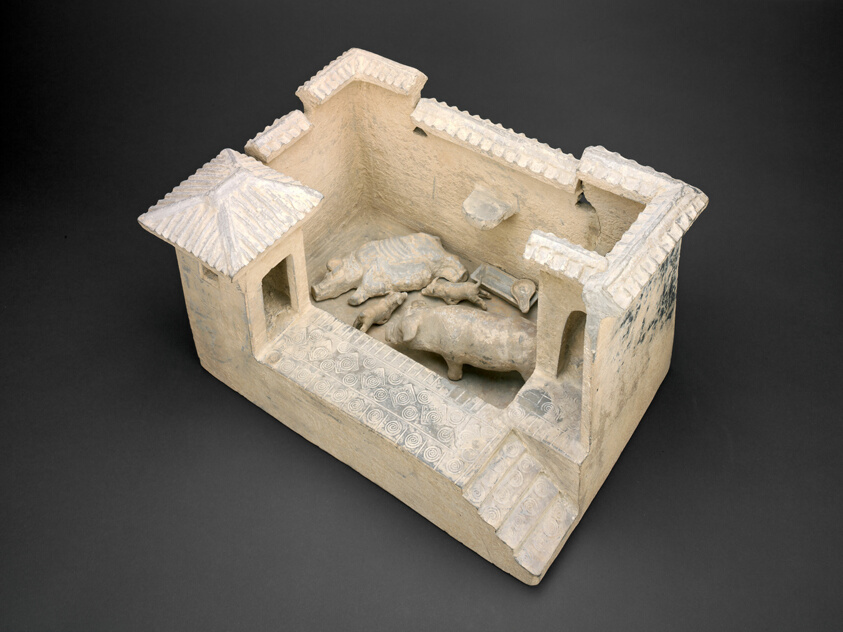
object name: Sculpture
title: Model of a Pigsty and Latrines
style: Chinese (culture or style)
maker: China; probably from Henan province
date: Han dynasty (206 BCE–220 CE), 100 BCE–100 CE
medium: Gray earthenware with stamped decoration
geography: China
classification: earthenware; ceramics; sculpture; asian art